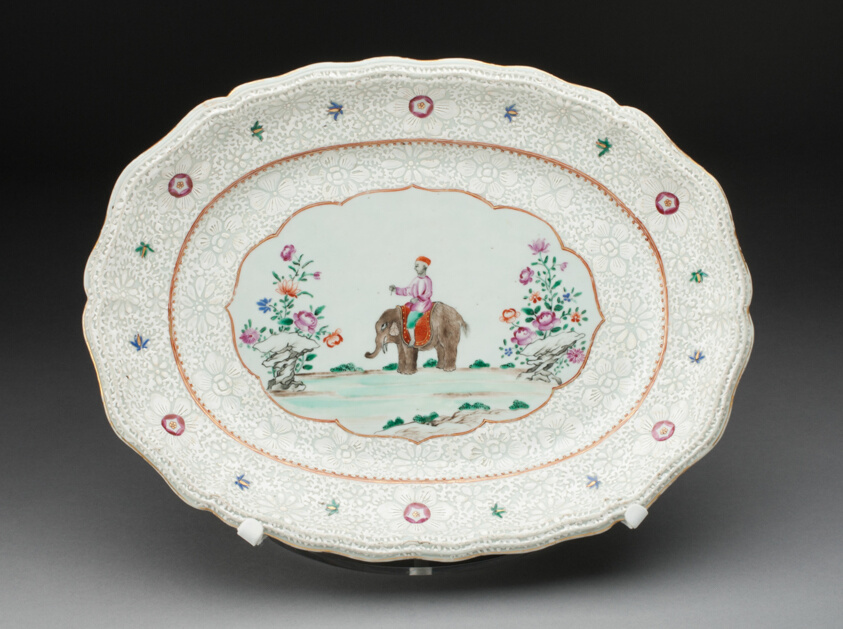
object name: Ceramics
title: Platter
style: chinese export, Chinese (culture or style), East Asian, asian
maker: China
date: c. 1760–c. 1800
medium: Hard-paste porcelain with polychrome enamels and gilding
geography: Jingdezhen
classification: vessel for serving food; dish (vessel); chinese export porcelain; porcelain; european decorative arts; ceramics